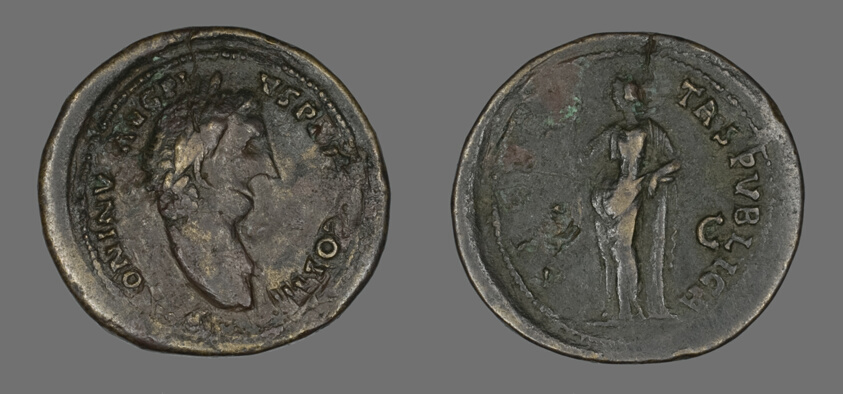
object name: Coin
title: Sestertius (Coin) Portraying Emperor Antoninus Pius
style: roman (ancient, style or period)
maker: Roman, minted in Rome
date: 140-143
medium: Bronze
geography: Roman Empire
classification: coin; ancient art